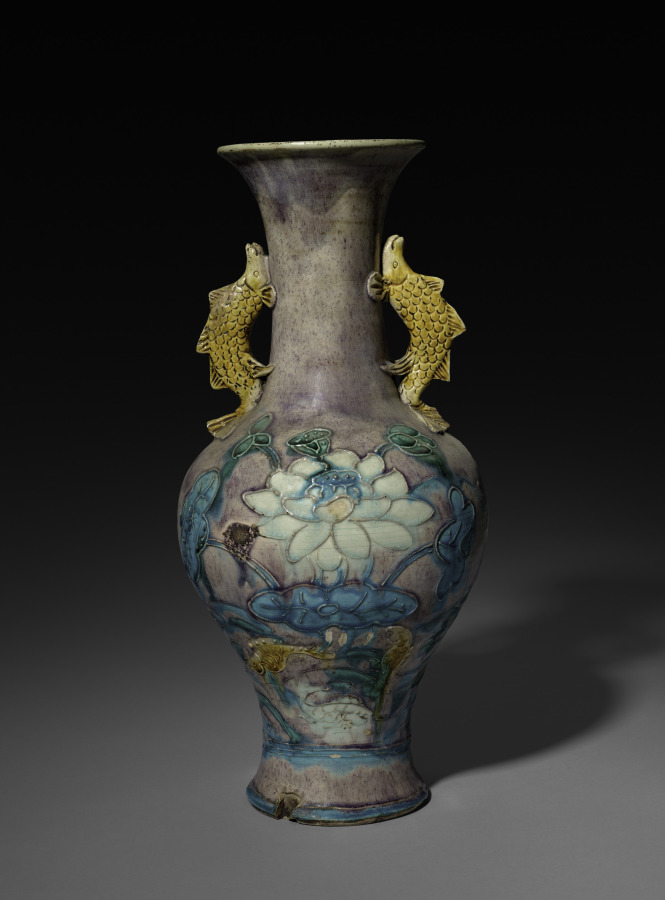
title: Beaker Vase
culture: China, Shanxi province, Ming dynasty (1368-1644)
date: 1368–1644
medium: Porcelain, Fahua ware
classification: Ceramic